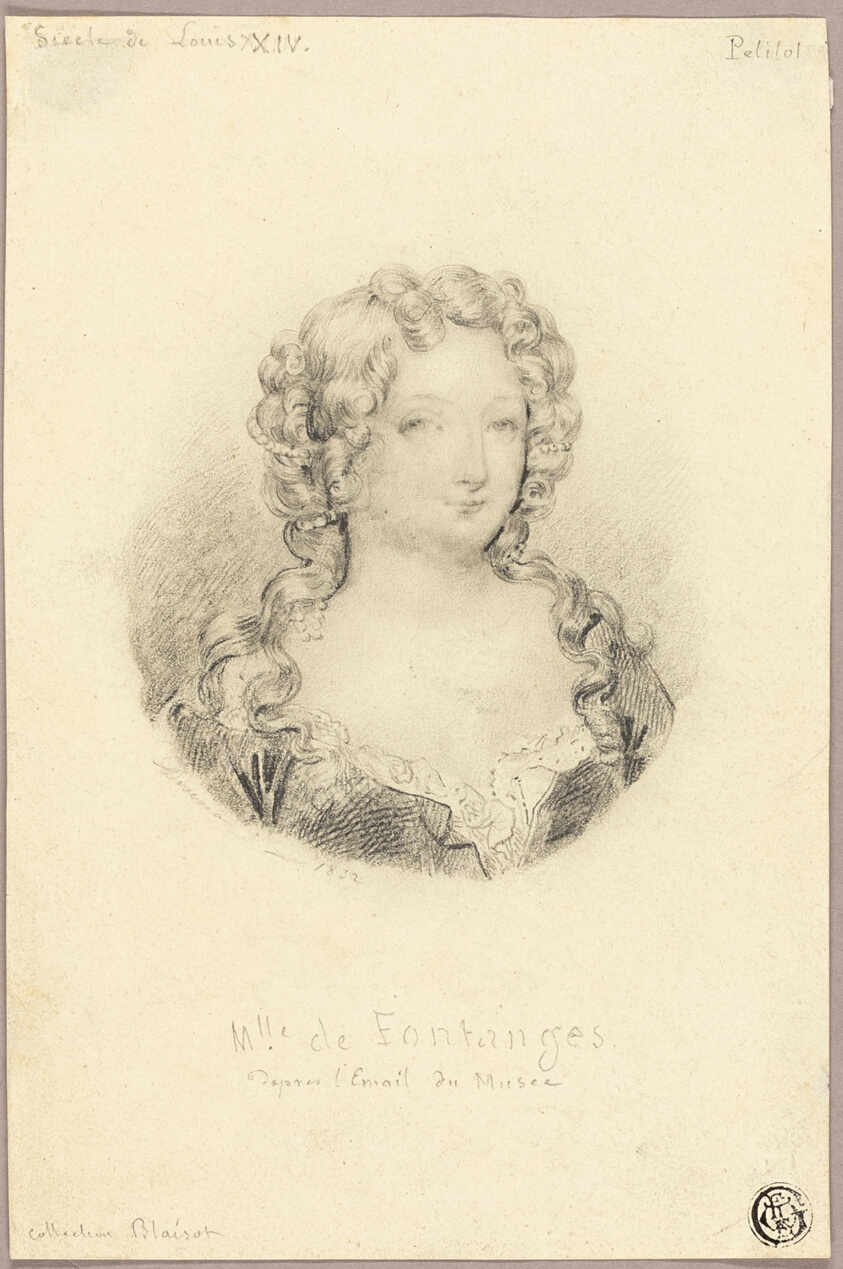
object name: Drawing and Watercolor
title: Medallion Portrait of Mlle de Fontanges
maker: Eugène Devéria (French, 1805-1865); after Jean Petitot (French, 1607-1691)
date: 1832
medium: Black chalk and graphite on cream wove paper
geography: France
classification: graphite; chalk; paper; drawings (visual works); prints and drawing